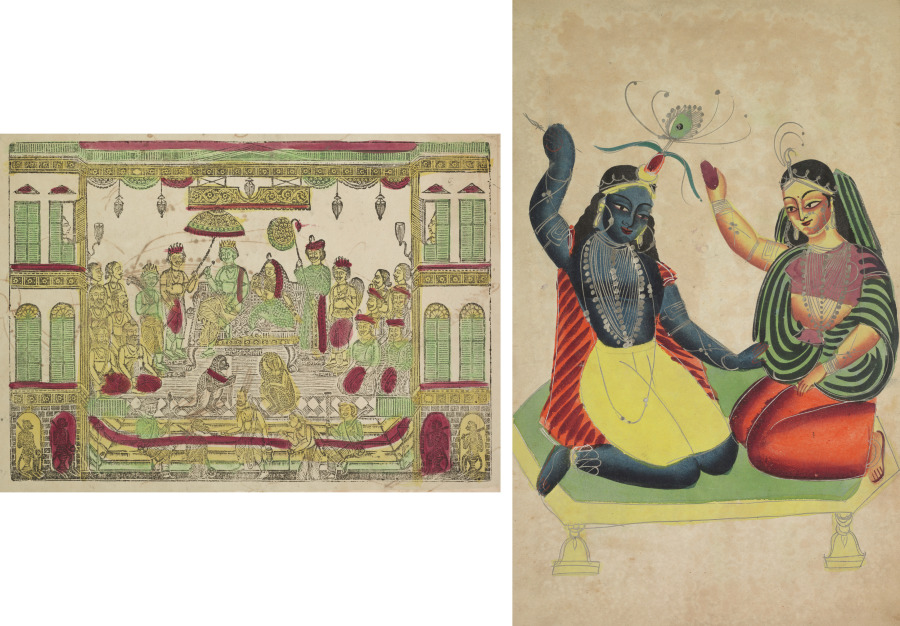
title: Leaf from a Kalighat album: Rama and Sita in the Royal Palace (recto); Radha and Krishna (verso)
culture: Eastern India, Bengal, Kolkata, Kalighat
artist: Shri Gobinda Chandra Roy (Indian, active late 1800s)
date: c. 1890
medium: Woodcut, hand colored with gum tempera; gum tempera, graphite, ink, and tin on paper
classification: Print